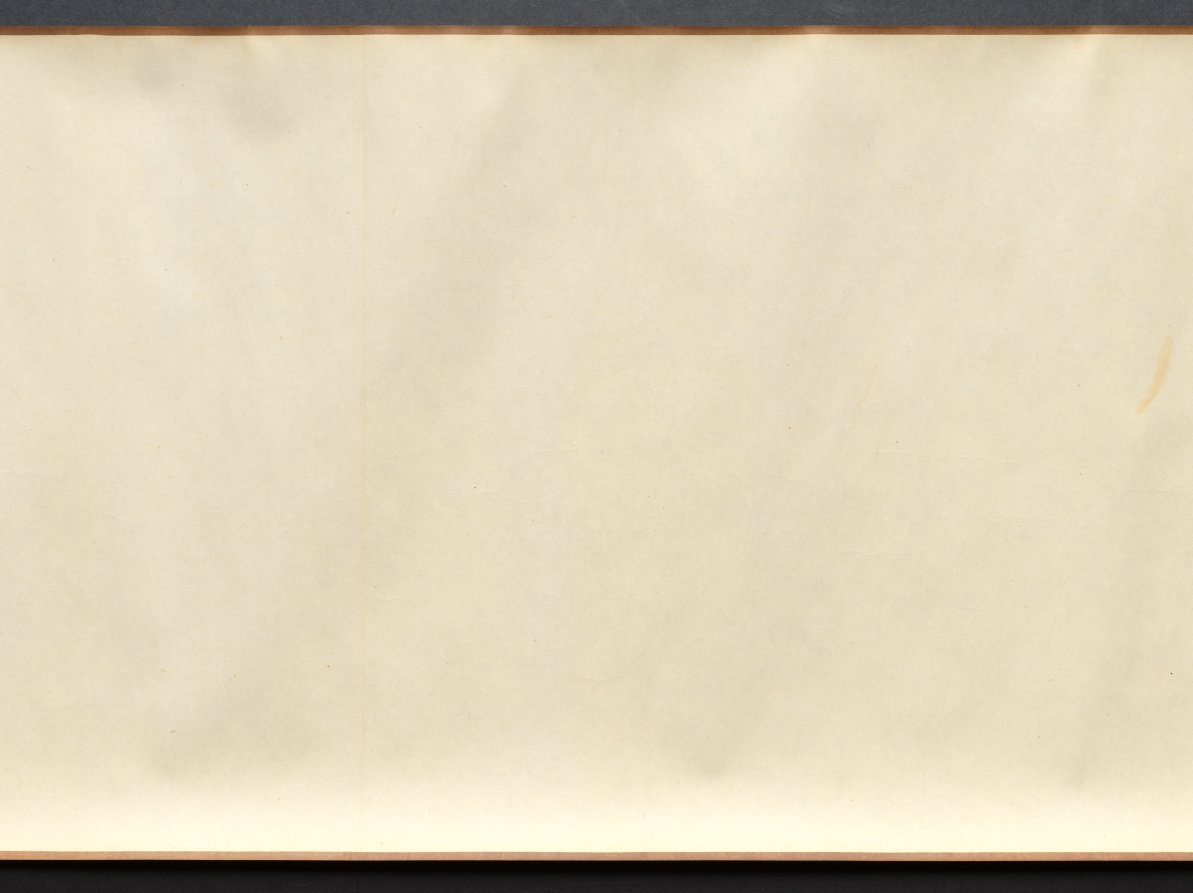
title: Returning to the Village in a Rainstorm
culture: China, Ming dynasty (1368–1644)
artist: Xie Shichen (Chinese, 1487–after 1567)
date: 1530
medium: Handscroll; ink and light color on silk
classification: Painting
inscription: 風雨歸村圖 嘉靖庚寅秋日樗仙謝時臣. [印] 謝時臣印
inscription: 3 additional seals unidentified.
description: This scroll depicts a wind- and rainswept landscape with figures in the countryside struggling against a late summer monsoon rainstorm. Such weather was familiar to residents of the lower Yangzi delta. Xie Shichen spent most of his life in the Suzhou area. Details of his career are scant, but his surviving works suggest that he made his living as a professional painter. This painting conveys drama and anecdotal observations, characteristic of Zhe school paintings, such as the one by Lü Wenying, CMA 1970.76.